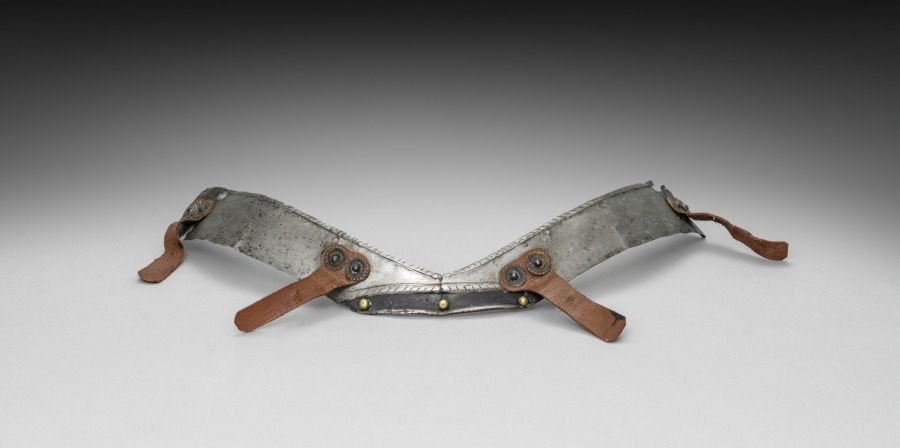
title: Fauld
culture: Germany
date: c.1550–1570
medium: iron, steel, leather and brass rivets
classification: Arms and Armor